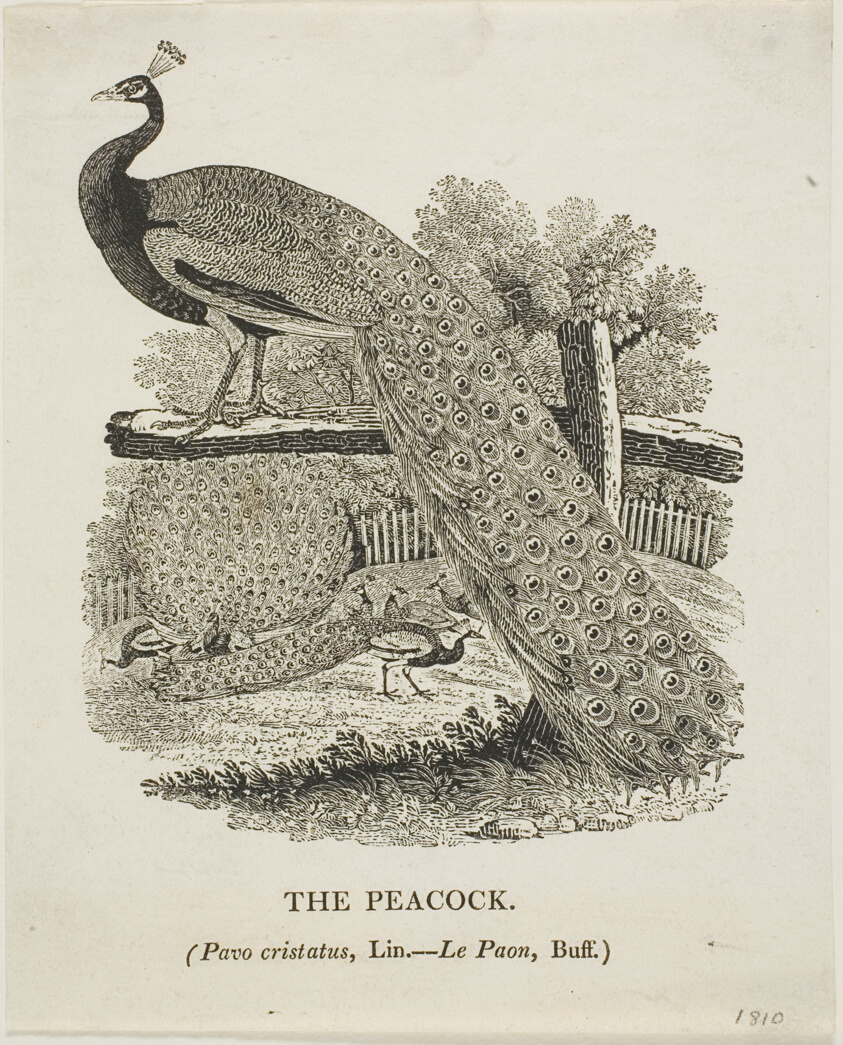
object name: Print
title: Peacock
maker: Thomas Bewick (English, 1753-1828)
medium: Woodcut on ivory wove paper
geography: England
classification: wood engraving; print; prints and drawing